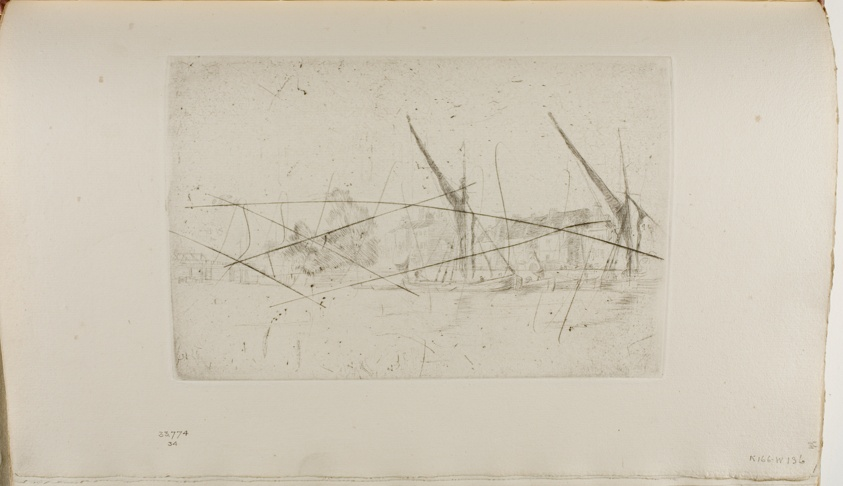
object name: Print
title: Lindsey Houses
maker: James McNeill Whistler (American, 1834-1903)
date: 1876/77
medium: Drypoint with foul biting, with drypoint cancellation, in black ink on ivory laid paper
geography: United States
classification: drypoint; prints and drawing; book; foul biting; print; paper